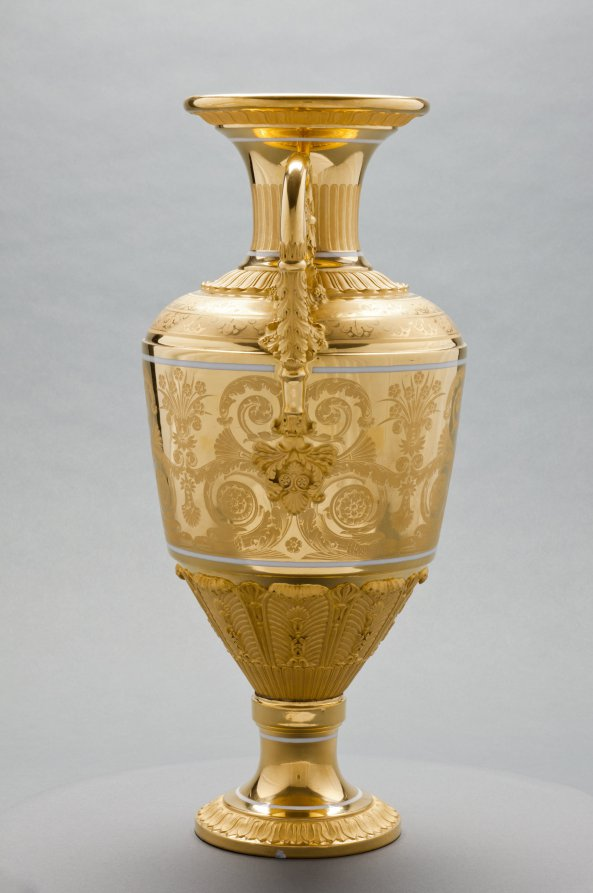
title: Vase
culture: Russia, St. Petersburg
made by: St. Petersburg Imperial Porcelain Factory (Russian)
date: c. 1820–1830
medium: gilt porcelain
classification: Ceramic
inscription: inscribed: "Moreau" in gold near lip.